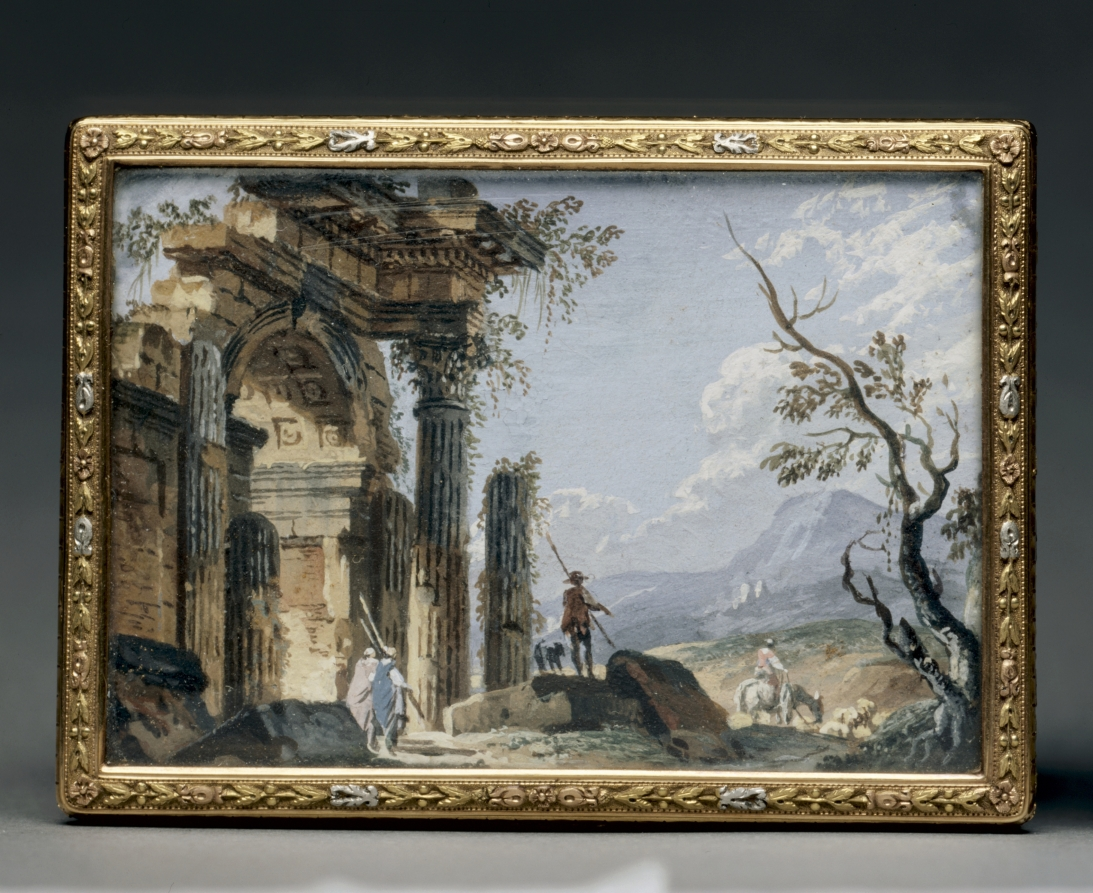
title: Rectangular Box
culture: France, 19th century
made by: Alexandre Leferre (French)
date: c. 1840–1850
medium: gouache miniatures mounted on gold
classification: Miscellaneous